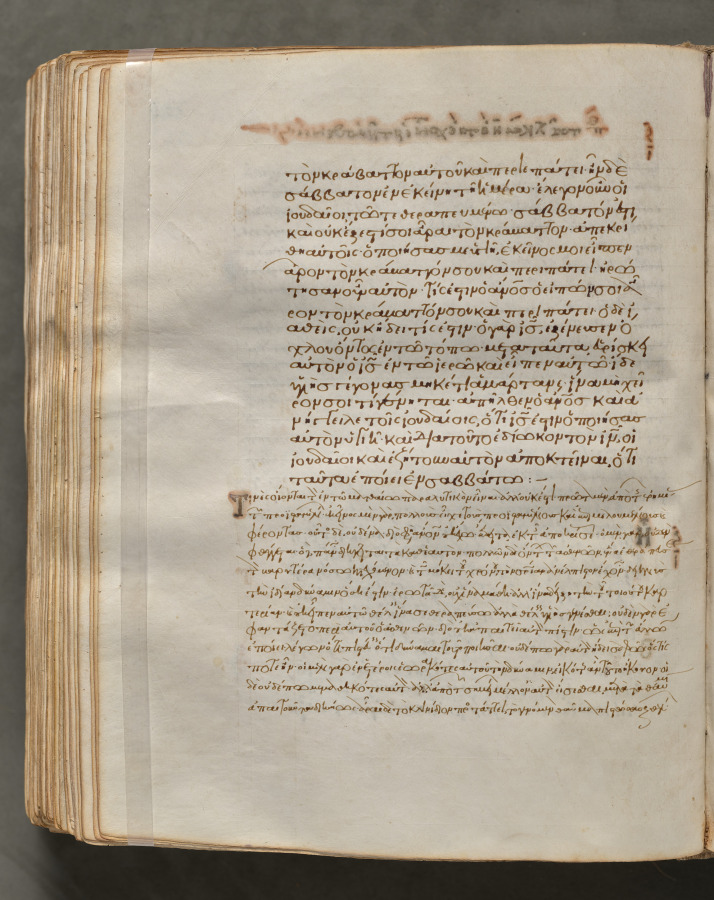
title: Text, folio 343 (verso), from a Gospel Book with Commentaries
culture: Byzantium, Constantinople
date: c. 1000–1100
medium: ink, tempera, and gold on vellum; leather binding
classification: Bound Volume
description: Each of the four gospels in this book opens on a page with brilliantly illuminated borders depicting the author of the text as well as birds—principally peacocks, symbols of the immortality of the soul—and fountains, representing the fountain of life and the salvation of the soul. This volume consists of 428 leaves with texts in Greek. Its level of sophistication suggests that it was probably written and decorated in a monastery in Constantinople.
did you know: Gospel books were carried in procession through Byzantine churches.